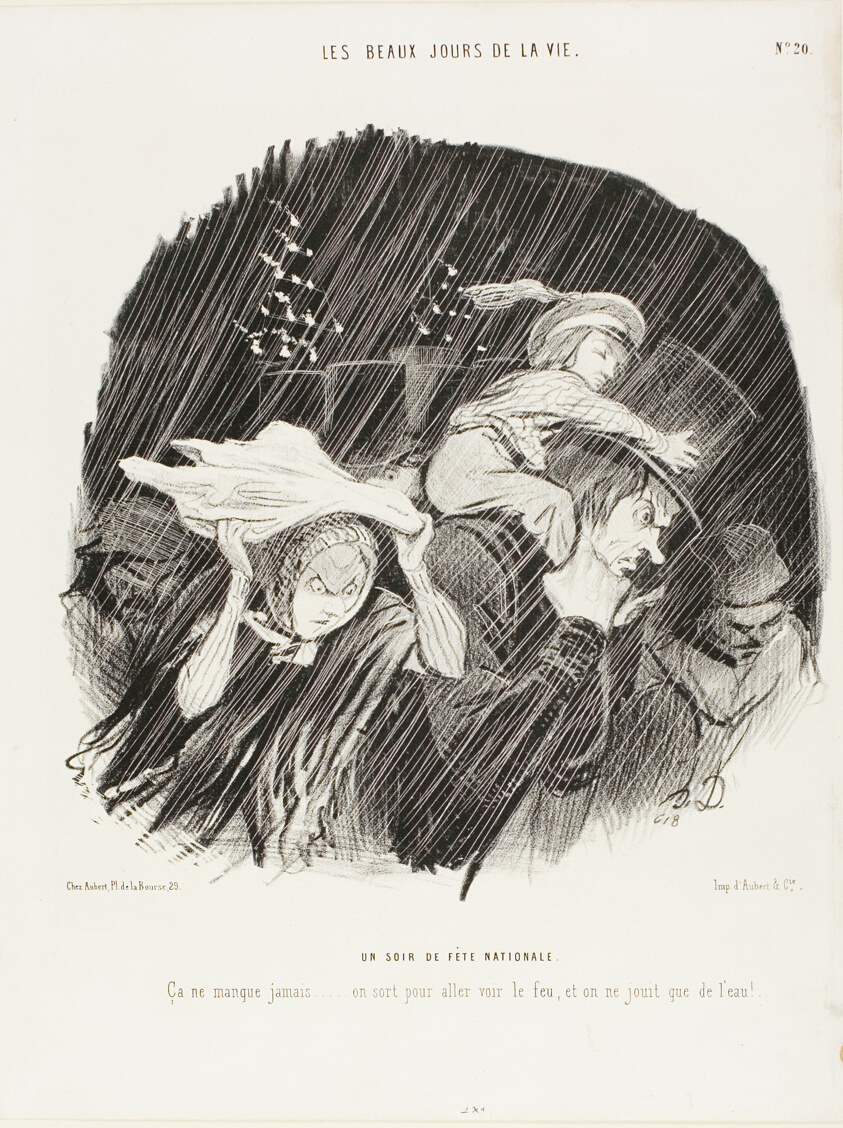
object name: Print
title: The Evening of the National Holiday. It never fails... you go out to see the fireworks, and all you get is waterworks!, plate 20 from The Best Days in Life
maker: Honoré Victorin Daumier; French, 1808-1879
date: 1844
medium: Lithograph in black on white wove paper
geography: France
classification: lithograph; print; prints and drawing